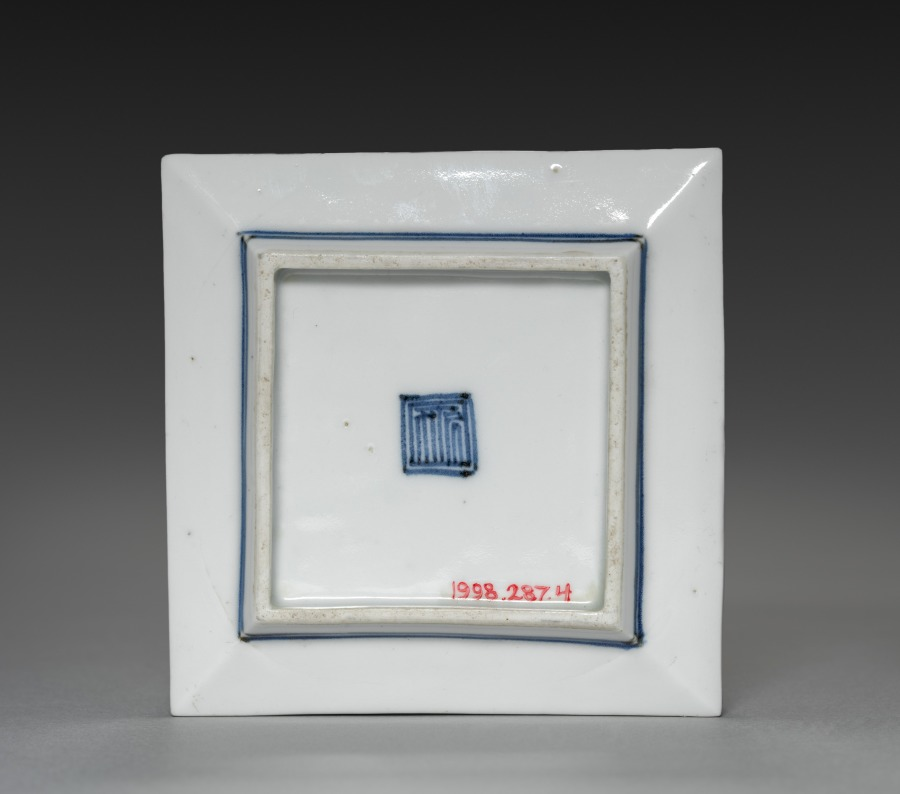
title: Side-Dish with Dandelion in Rocks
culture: Japan, Edo period (1615–1868)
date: 1700s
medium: One of a set of five dishes; porcelain with underglaze blue and overglaze iron oxide (Arita ware, Kutani style)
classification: Ceramic